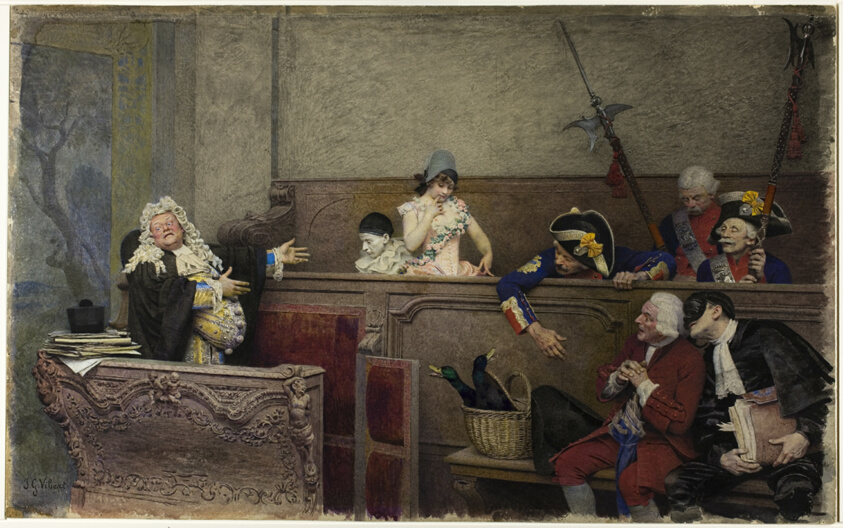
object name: Drawing and Watercolor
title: Trial of Pierrot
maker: Jehan Georges Vibert (French, 1840-1904)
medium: Watercolor and gouache, over graphite, on cream board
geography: France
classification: gouache; drawings (visual works); prints and drawing